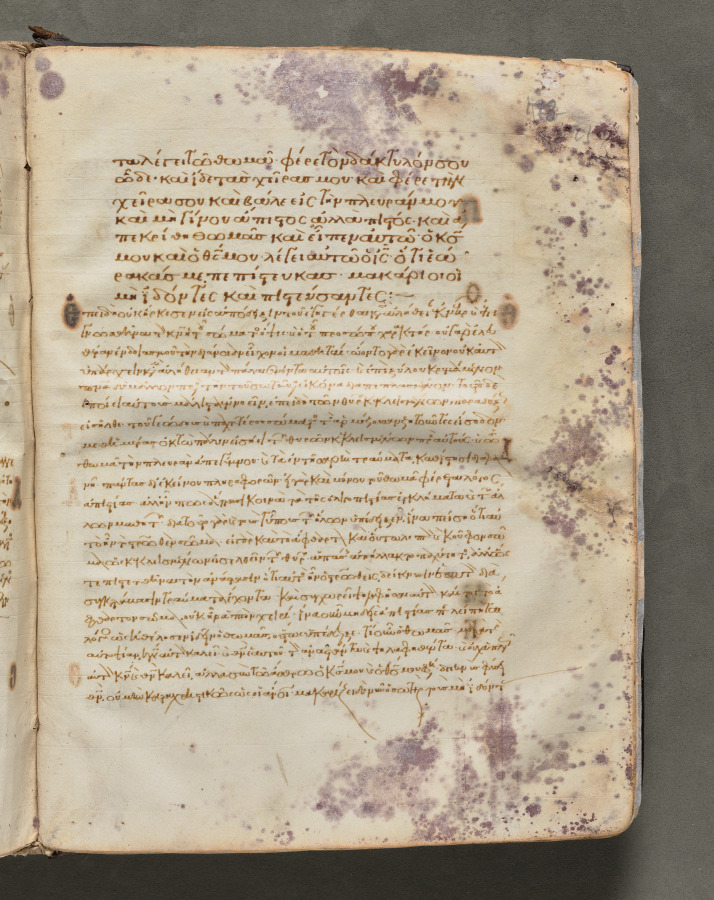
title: Text, folio 421 (recto), from a Gospel Book with Commentaries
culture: Byzantium, Constantinople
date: c. 1000–1100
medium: ink, tempera, and gold on vellum; leather binding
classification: Bound Volume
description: Each of the four gospels in this book opens on a page with brilliantly illuminated borders depicting the author of the text as well as birds—principally peacocks, symbols of the immortality of the soul—and fountains, representing the fountain of life and the salvation of the soul. This volume consists of 428 leaves with texts in Greek. Its level of sophistication suggests that it was probably written and decorated in a monastery in Constantinople.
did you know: Gospel books were carried in procession through Byzantine churches.